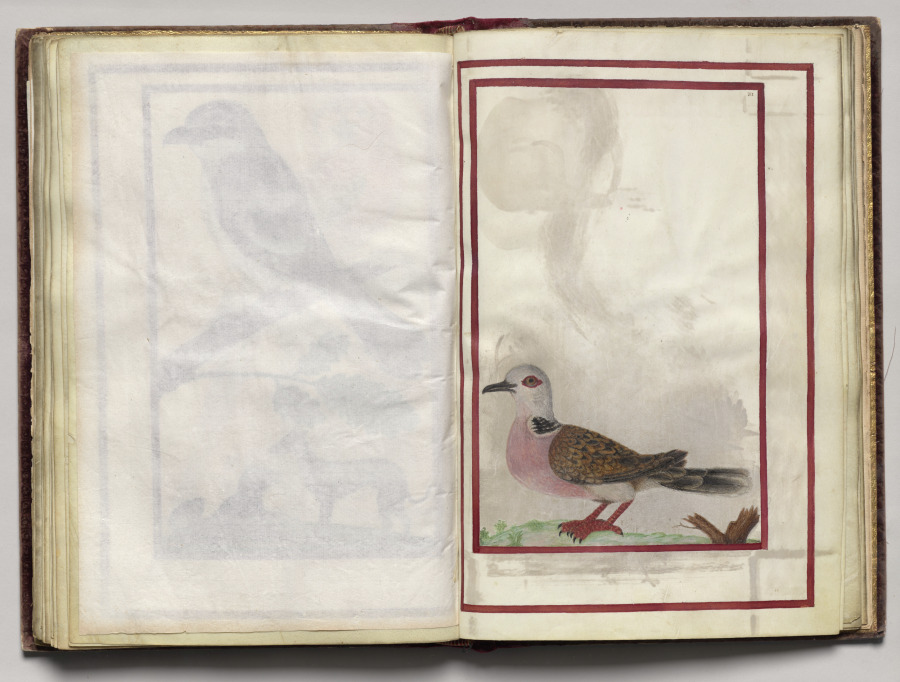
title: Pink Breasted Bird, folio 39 (recto), from Florilegium (A Book of Flower Studies)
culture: France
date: 1608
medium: watercolor, ink, silver, and gold over occasional traces of pencil, on vellum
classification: Bound Volume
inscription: Dated: Poitiers 1608 (on frontispiece) Signed: On frontispiece in black ink, lower right: Van Kuyk Notation on drawing: Frontispiece: in pencil, lower margin: * élève de Van Kessel, peintre flammand (* in pencil also appears in front of Van Kuyk's name).